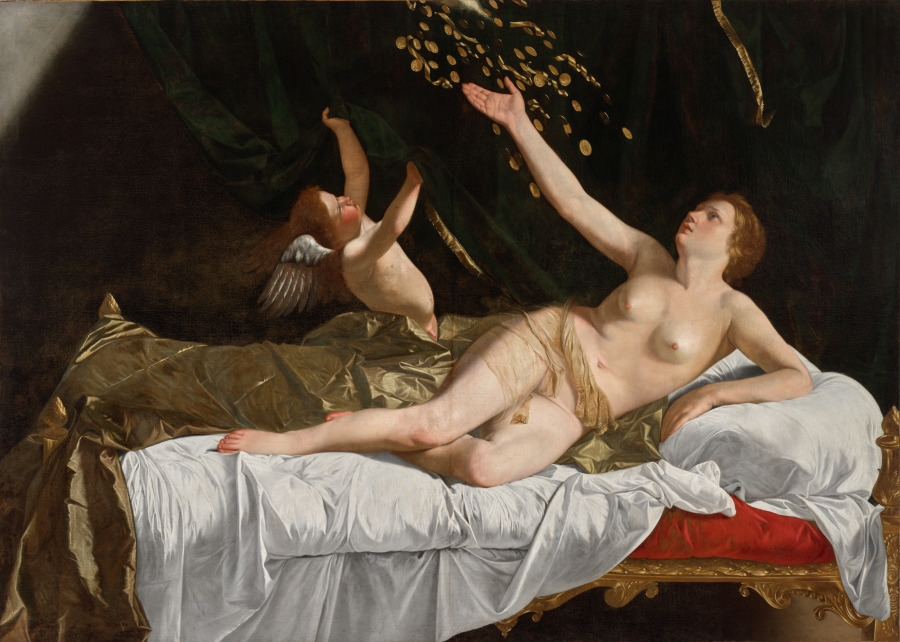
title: Danaë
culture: Italy, 17th century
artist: Orazio Gentileschi (Italian, 1563–1639)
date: c. 1623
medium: oil on canvas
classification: Painting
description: Danaë’s father feared a prophecy that his grandson would kill him, so he imprisoned his daughter to protect her from suitors. Yet Jupiter, king of the gods, fell in love with Danaë, and he came to her in the form of gold streaming from the sky. Gentileschi adopted Caravaggio’s method of painting directly from models, pulled to the front of the picture plane, which gives the painting a startling, tangible quality. However, the graceful way he handled paint and human gestures lends the work a poetic quality unique to the artist.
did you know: The gauzy scarf draped over Danaë was a studio prop present in many of Orazio's paintings.